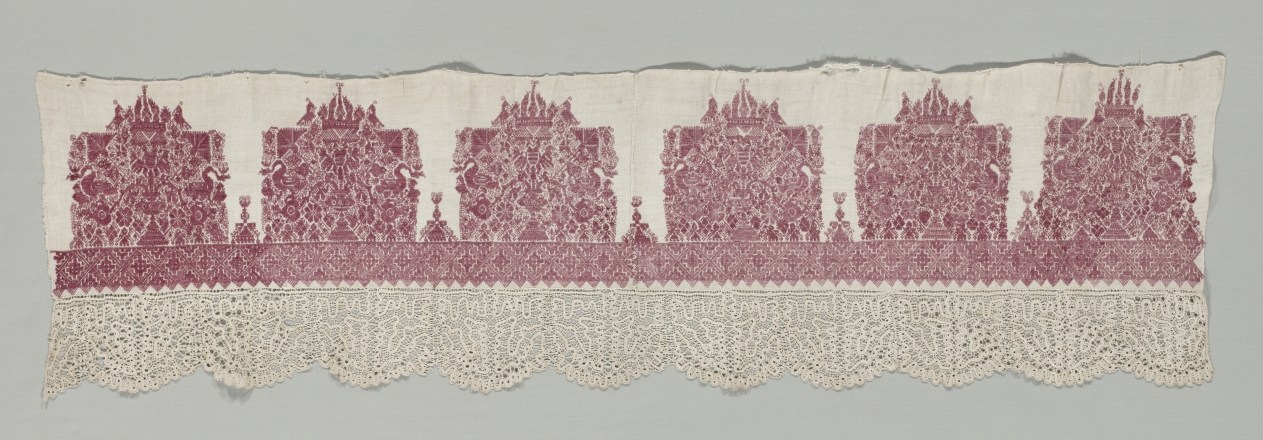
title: Altar Frontal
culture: Italy, 17th-18th century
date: 1600s-1700s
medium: embroidery: linen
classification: Embroidery